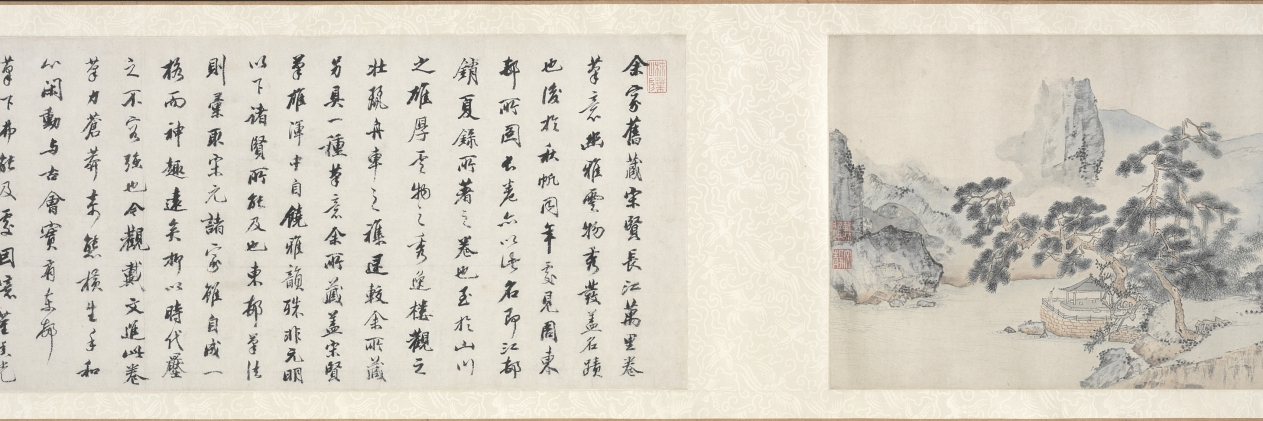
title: Ten Thousand Li of the Yangzi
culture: China, Ming dynasty (1368–1644)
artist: Dai Jin (Chinese, 1388–1462)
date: c. 1400s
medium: Handscroll; ink and color on paper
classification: Painting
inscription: Two colophons at end. Artist's seals: Dai Jin 戴進 and Wenjin 文進.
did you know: Dai Jin is traditionally considered the founder of the Zhe School, a style of landscape painting.